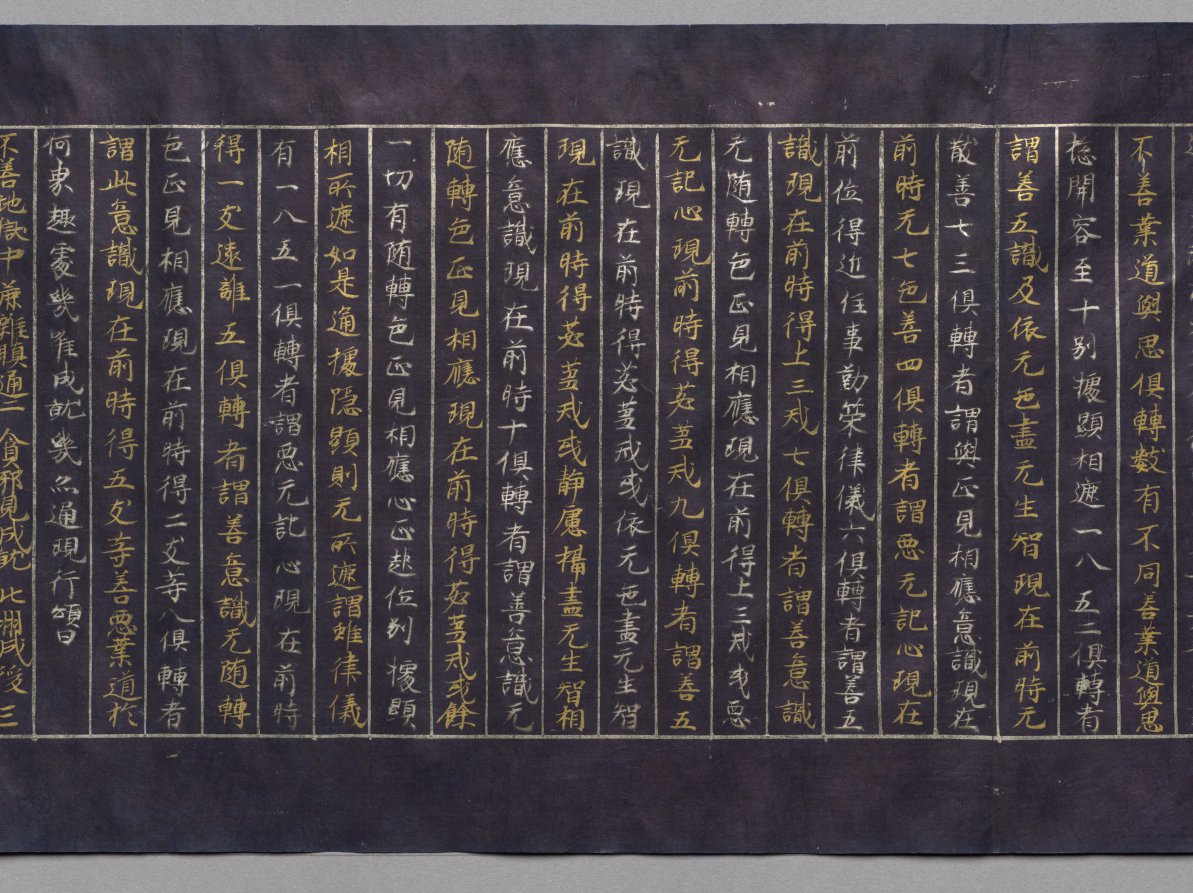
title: Meta-Discourse on the Teachings from the Treasury (Abidharmakosha-Bhashya)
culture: Japan, Heian period (794–1185)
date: 1100s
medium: handscroll; gold and silver on indigo-dyed paper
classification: Manuscript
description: This religious text relates some of the teachings of the great fourth-century Indian Buddhist scholar Vasubhandhu. The text analyzes human consciousness in its relationship to the environment and transformations that occur during meditation. This scroll is the 17th part of a 30-part translation of the text by Xuanzang, an eminent seventh-century Chinese monk.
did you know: The frontispiece depicts the Buddha Shakyamuni preaching in a paradisical landscape.